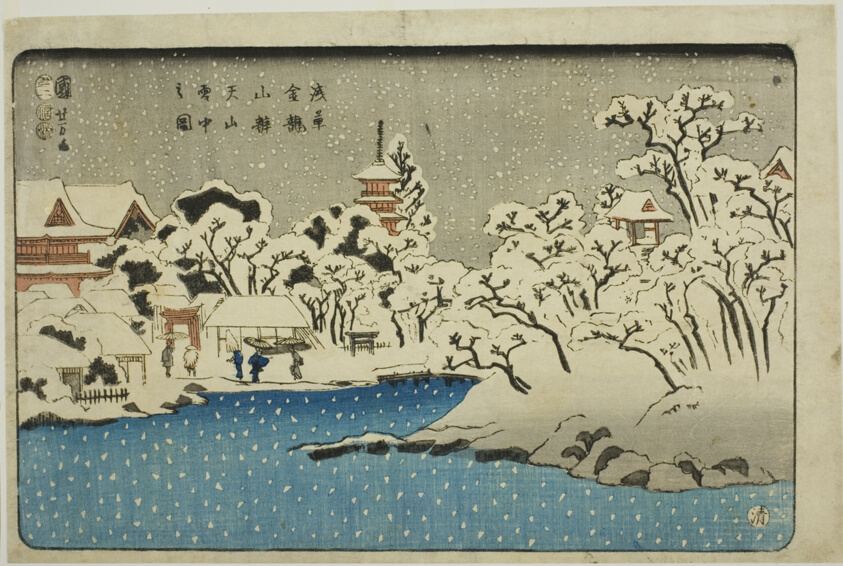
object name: Print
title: Snow on Benten Hill at Kinryuzan Temple in Asakusa (Asakusa Kinryuzan Bentenyama setchu no zu)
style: Japanese (culture or style)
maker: Utagawa Kuniyoshi (Japanese, 1797-1861)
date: 1853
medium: Color woodblock print; oban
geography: Japan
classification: woodblock print; print; asian art